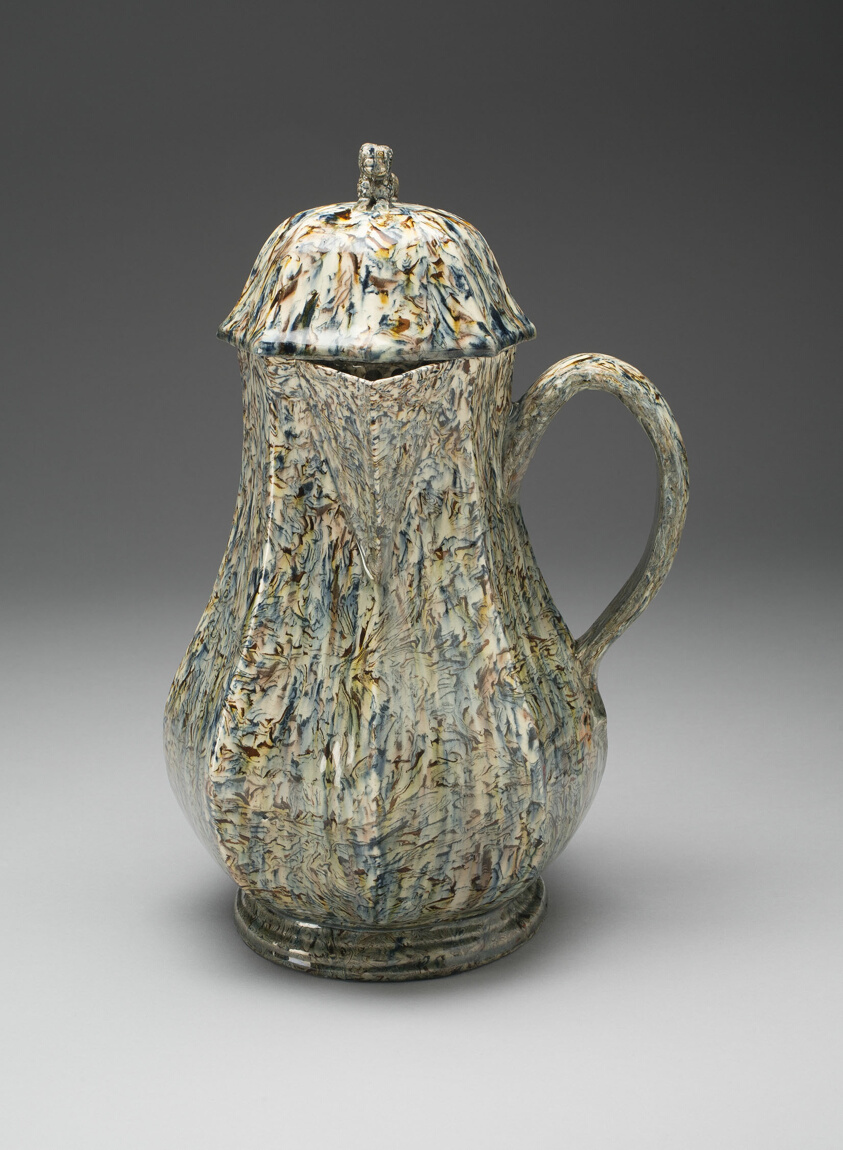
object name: Ceramics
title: Coffee Pot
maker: England, Staffordshire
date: 1750/65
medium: Lead-glazed earthenware (agateware)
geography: Staffordshire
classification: earthenware; european decorative arts; agateware; ceramics